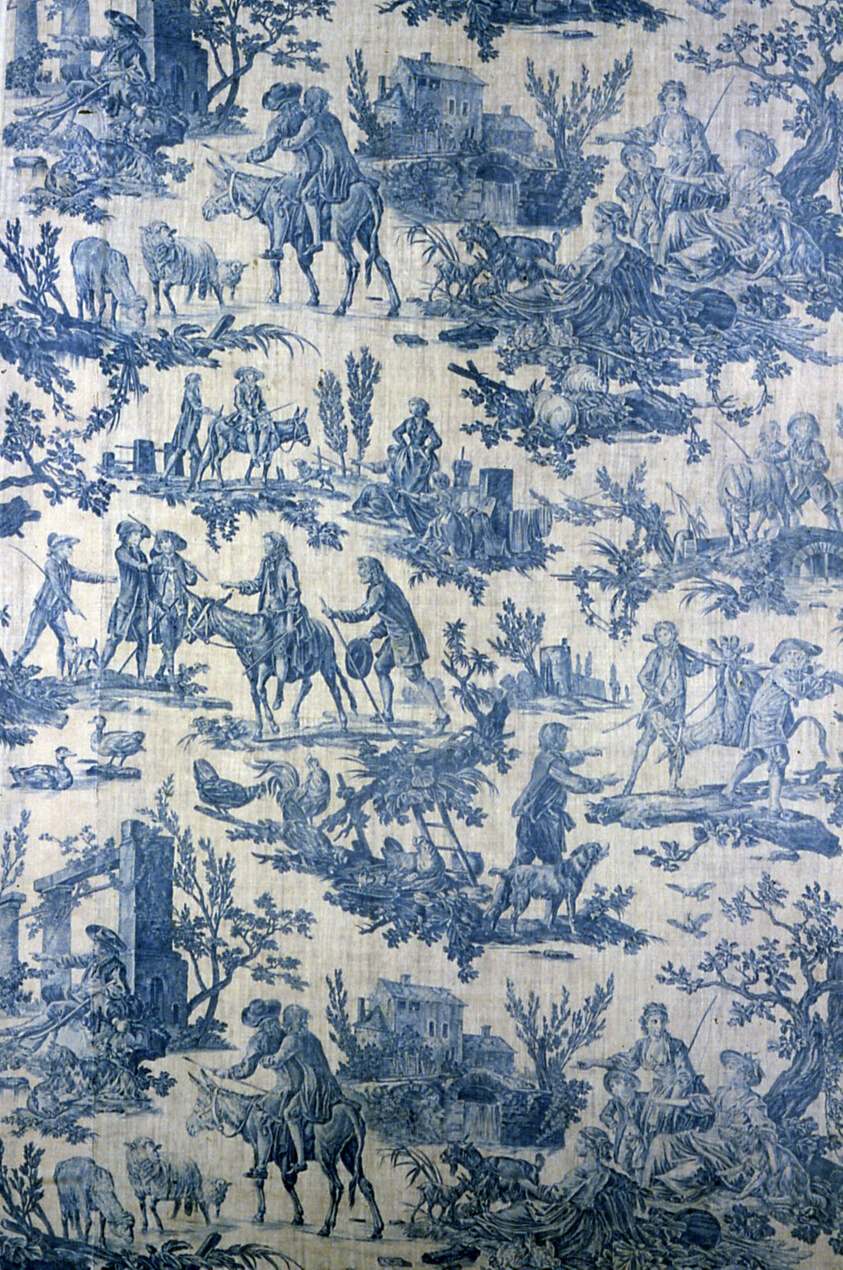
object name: Textile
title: Le Meunier, Son Fils, et l'Ane (The Miller, His Son, and the Ass) (Furnishing Fabric)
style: jouy-en-Josas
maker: Designed by Jean Baptiste Huet (French, 1745–1811) after Jean Baptiste Oudry (French, 1686–1755); Manufactured by Christophe-Philippe Oberkampf (naturalized French, 1738-1815), Oberkampf Manufactory (French, 1760-1843); Jouy-en-Josas, France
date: 1806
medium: Cotton, plain weave; copperplate printed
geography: Jouy-en-Josas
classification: textile; weaving - printed; furnishing textile